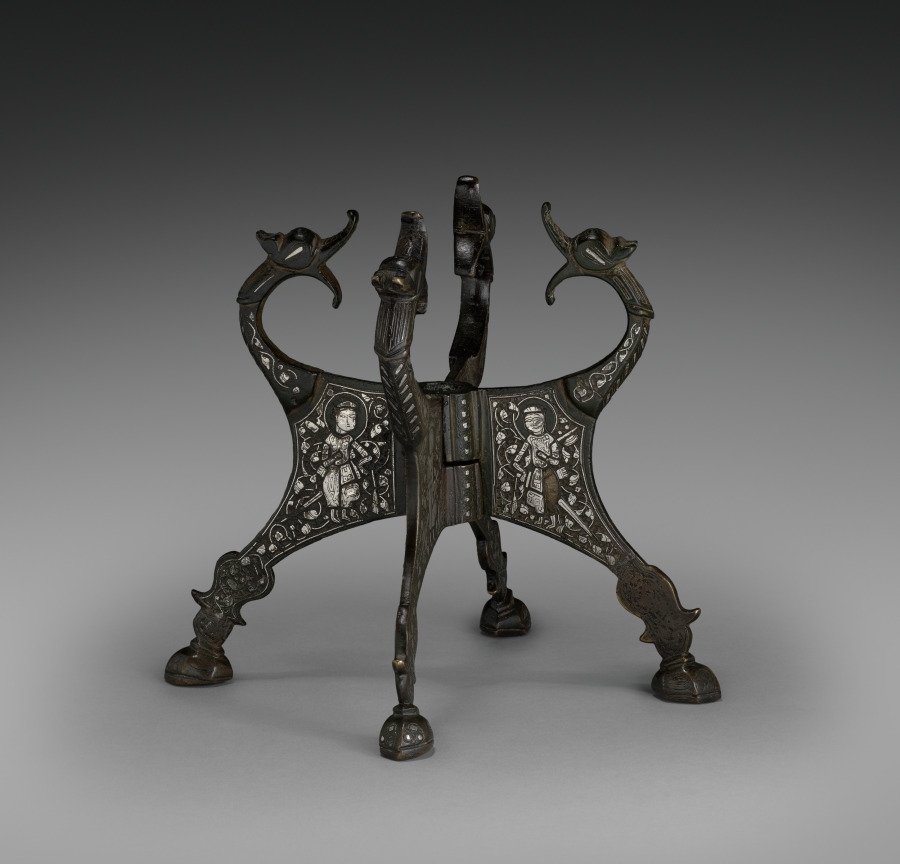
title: Dragon-headed Stand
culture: Northern Iraq or Syria, Zangid (1127–1251) or Ayyubid period (1171–1260)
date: 1200s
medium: cast brass inlaid with silver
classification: Metalwork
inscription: None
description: Themes of hunting and combat are evoked by this stand with gaping dragon heads and figures armed with swords and spears.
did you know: The four-legged stand has two interlocking parts.